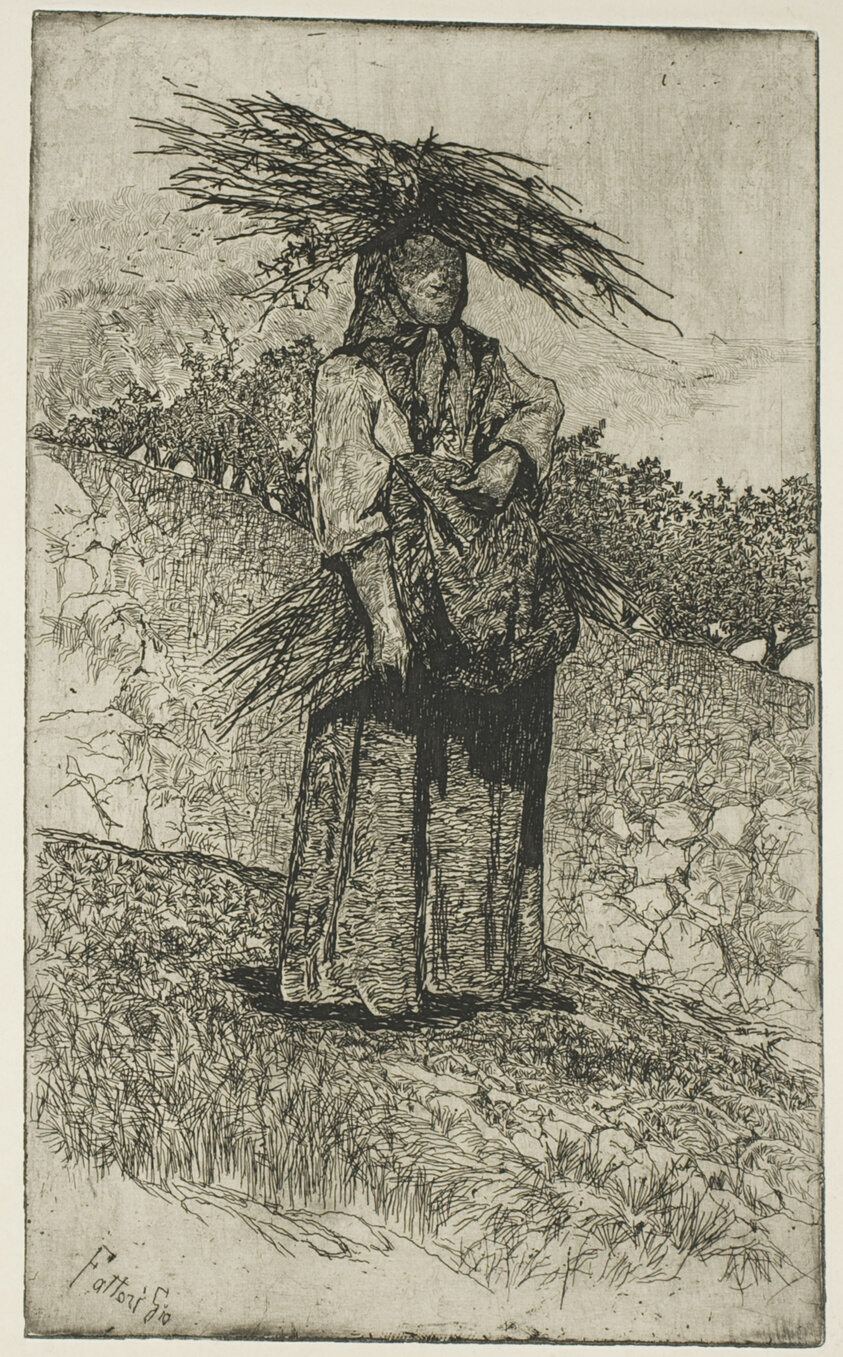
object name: Print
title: Boscaiola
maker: Giovanni Fattori (Italian, 1825-1908)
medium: Etching in black, with plate tone, on cream wove paper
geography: Italy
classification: etching; paper; print; prints and drawing